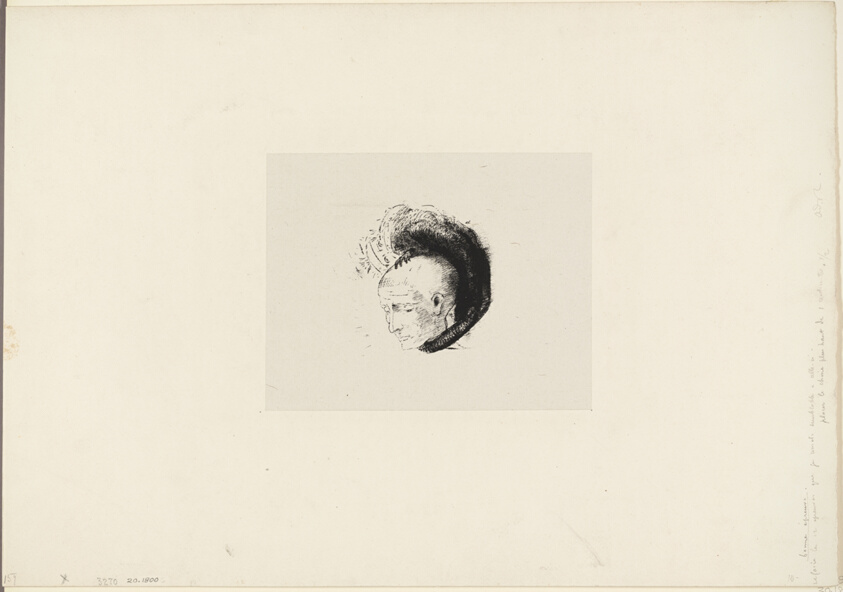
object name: Print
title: Frontispiece for Le mouvement idéaliste en peinture (The Idealistic Movement in Painting) by André Mellerio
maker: Odilon Redon (French, 1840-1916)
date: 1896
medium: Lithograph in black on ivory China paper laid down on ivory wove paper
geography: France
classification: lithograph; print; prints and drawing; paper